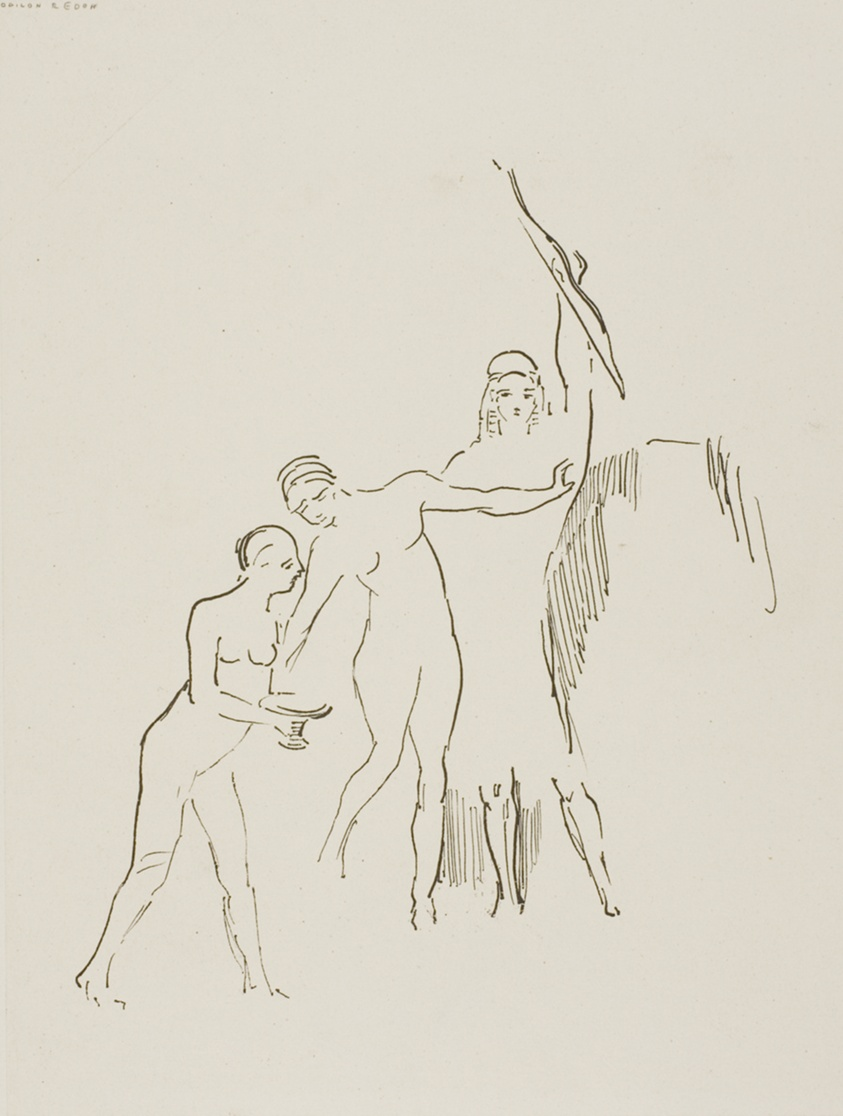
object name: Print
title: Immediately Three Goddesses Arise, plate 11 of 24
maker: Odilon Redon (French, 1840-1916)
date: 1896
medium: Lithograph in black on ivory China paper laid down on ivory wove paper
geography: France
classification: lithograph; print; prints and drawing; paper